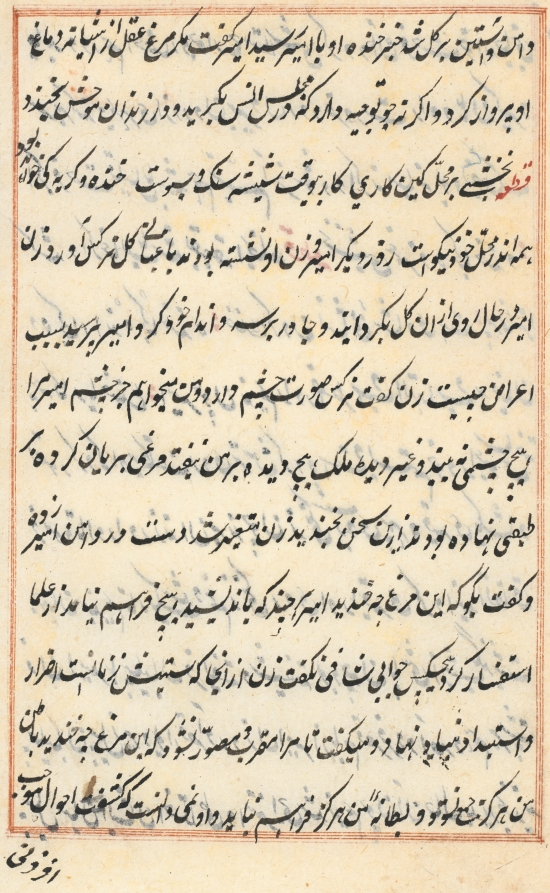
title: Page from Tales of a Parrot (Tuti-nama): text page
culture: Mughal India, court of Akbar (reigned 1556–1605)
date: c. 1560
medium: gum tempera, ink, and gold on paper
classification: Painting